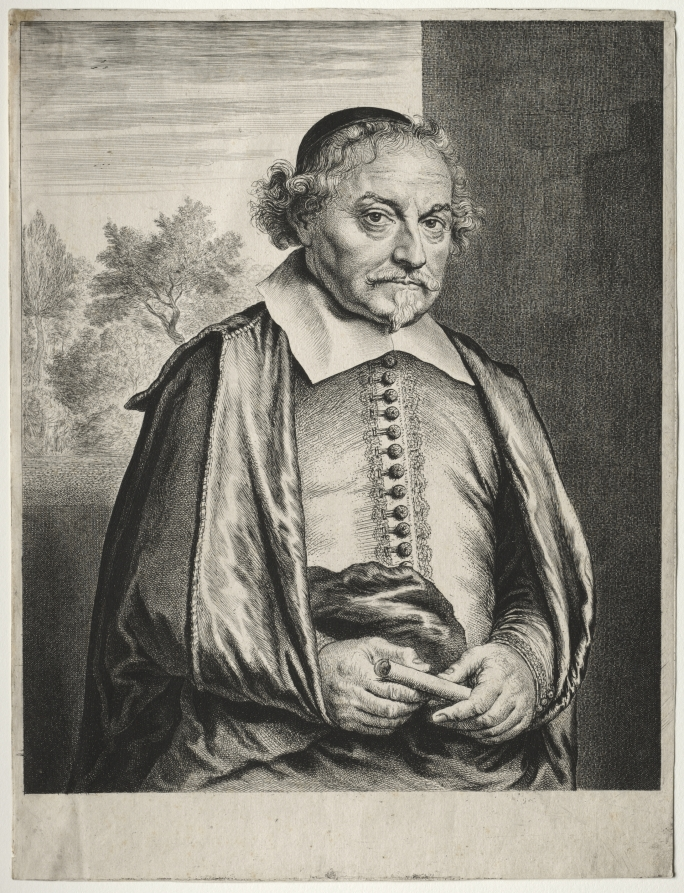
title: Justus Vondel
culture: Netherlands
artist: Jan Lievens (Dutch, 1607–1674)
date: 1644–50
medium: etching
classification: Print